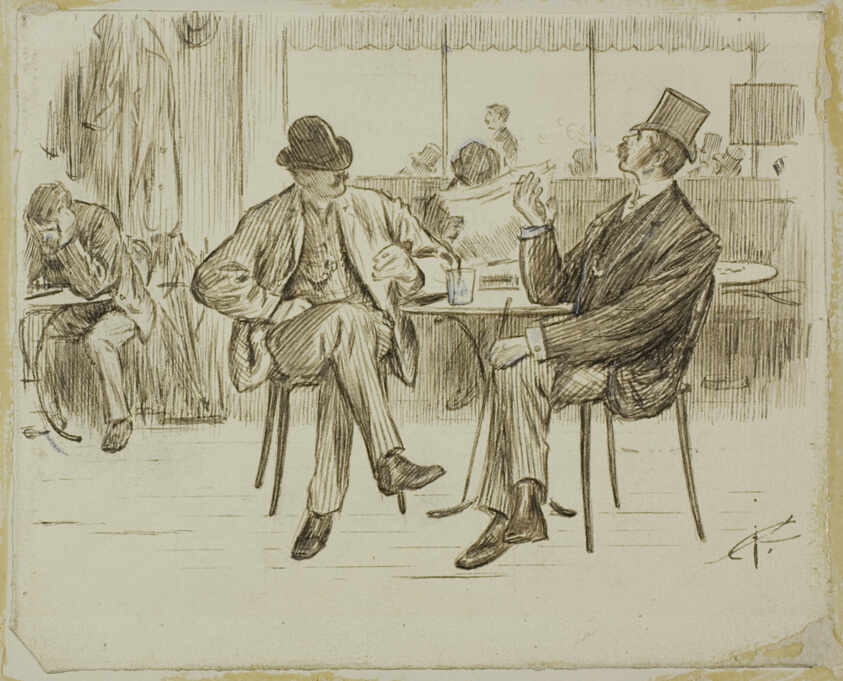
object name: Drawing and Watercolor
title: Café Scene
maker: Charles Samuel Keene (British, 1823-1891)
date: 1870/91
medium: Pen and brown ink, corrected with white gouache, on cream wove paper, laid down on ivory wove paper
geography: England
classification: pen and ink drawings; drawings (visual works); prints and drawing